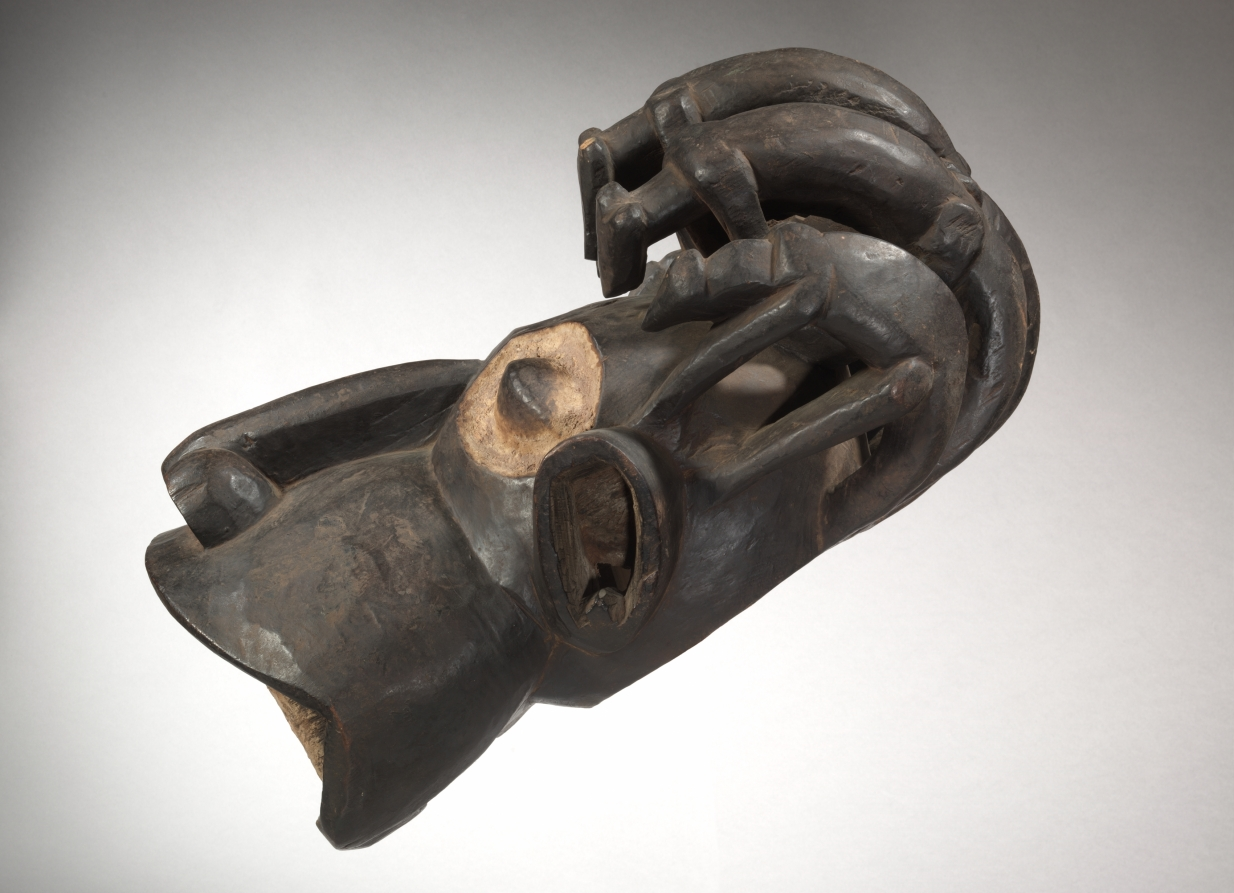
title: Helmet Mask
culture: Africa, Central Africa, Cameroon, possibly Kom-style maker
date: early 1900s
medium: Wood, paint, organic material, and iron alloy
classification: Mask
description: Deliberately distorted and exaggerated facial features reflect the awesome powers of a great chief. The quadrupeds on the mask’s head suggest the close association between the leopard and the king. In the Cameroon grasslands, masks are typically related to a regulatory society that guards ancestral mores; society members wear the masks and dance in the secrecy of the night.